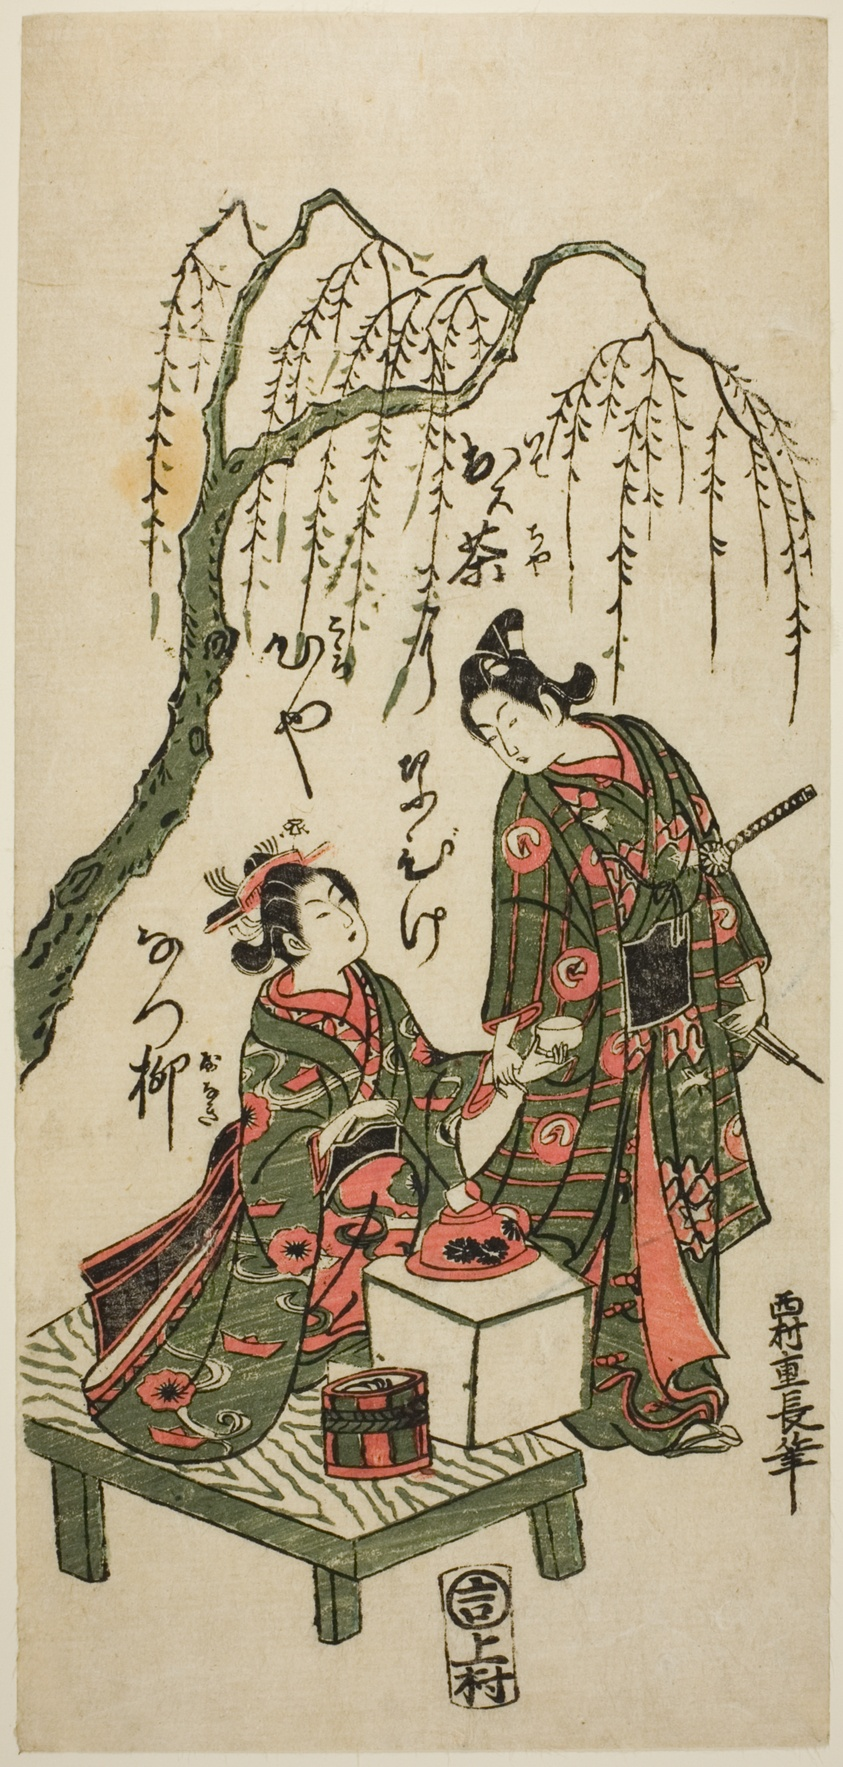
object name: Print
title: Serving tea under a willow tree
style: Japanese (culture or style)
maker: Nishimura Shigenaga (Japanese, 1697 (?)-1756)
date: 18th century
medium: Color woodblock print; hosoban, benizuri-e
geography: Japan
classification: woodblock print; print; asian art